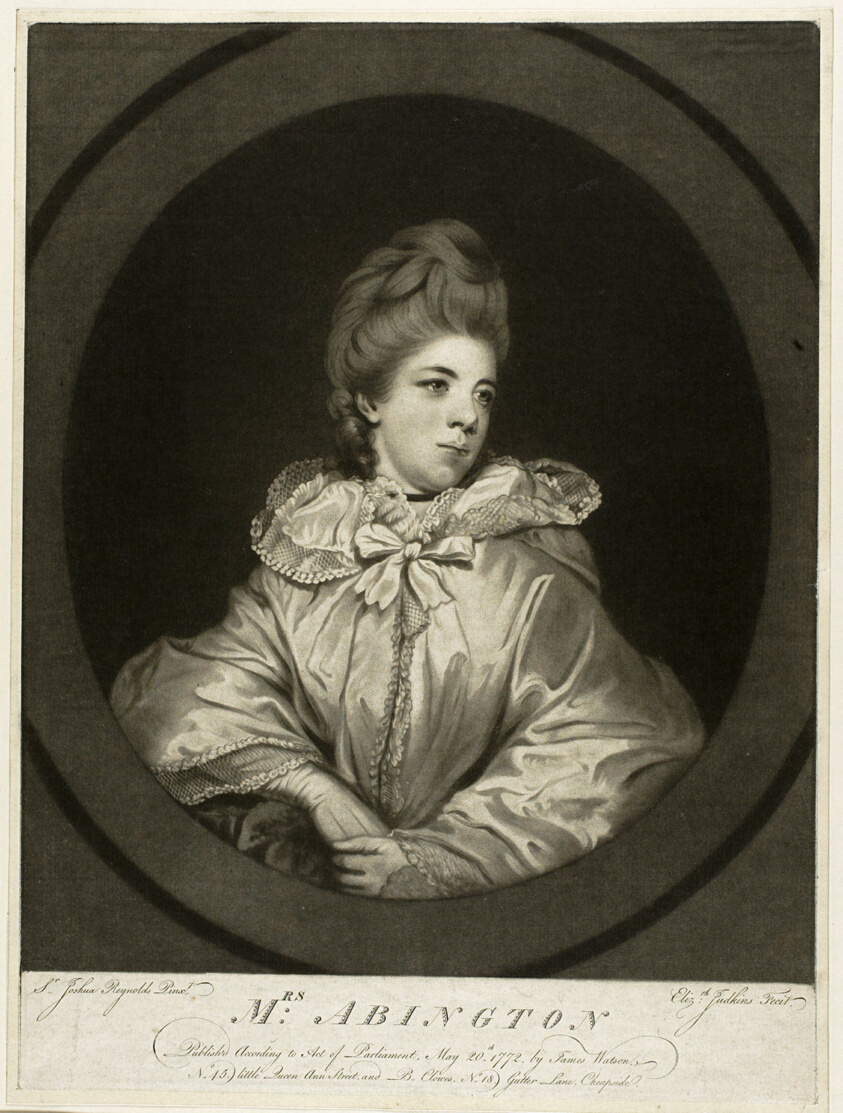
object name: Print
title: Mrs. Abington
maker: Elizabeth Judkins (English, active 1772); after Joshua Reynolds (English, 1723-1792)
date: published 1772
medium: Mezzotint on paper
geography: England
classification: mezzotint; print; prints and drawing